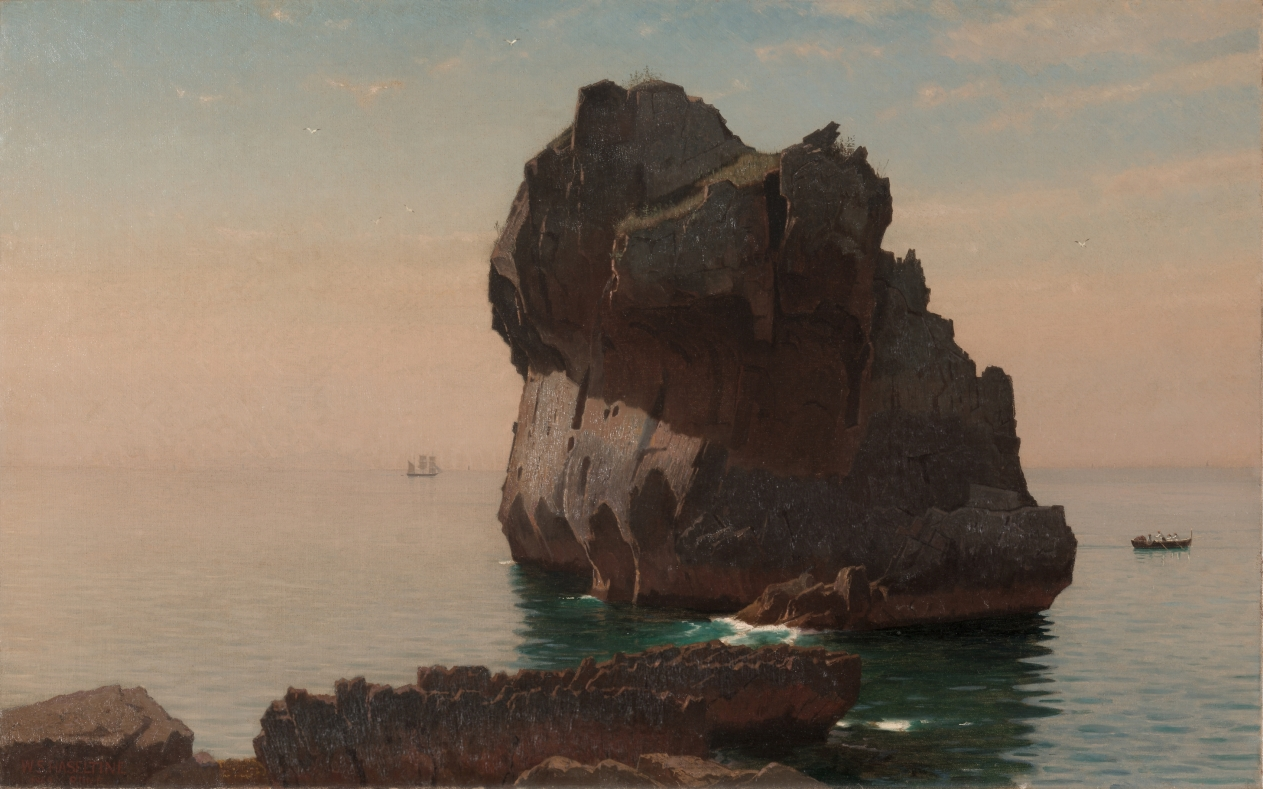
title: Capri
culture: America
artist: William Stanley Haseltine (American, 1835–1900)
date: 1869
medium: oil on canvas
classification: Painting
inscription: signed lower left: W.S. HASELTINE / 1869 ROME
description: The Philadelphia-born Haseltine favored images of coastal rocks, painting them on both sides of the Atlantic throughout his career. Best known for his scenes of Maine and Massachusetts shorelines, Haseltine based this painting on volcanic rocks from the uninhabited eastern end of Capri, an island off the southwestern coast of Italy.